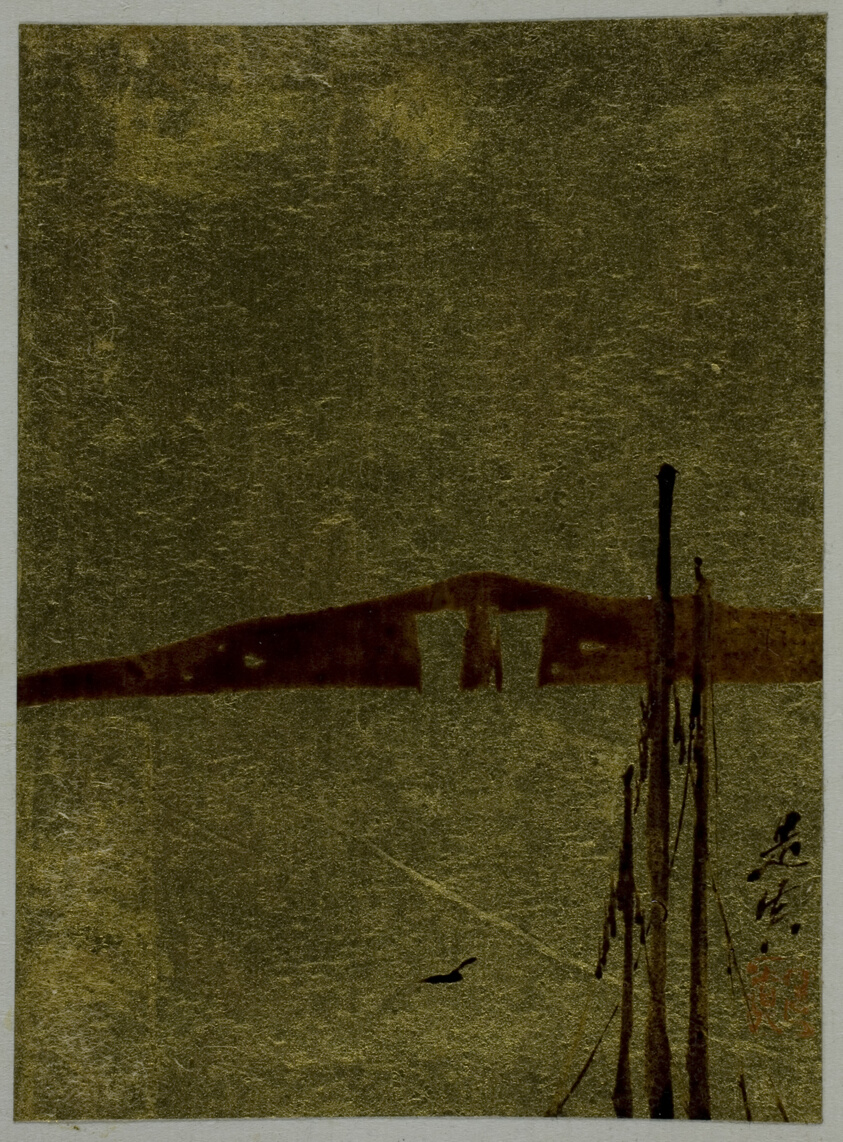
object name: Painting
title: Water Scene with Mountain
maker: Shibata Zeshin (Japanese, 1807-1891)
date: Meiji Period (1868–1912)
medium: Album leaf; ink and colors on paper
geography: Japan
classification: album leaf; album/sketchbook; asian art; painting